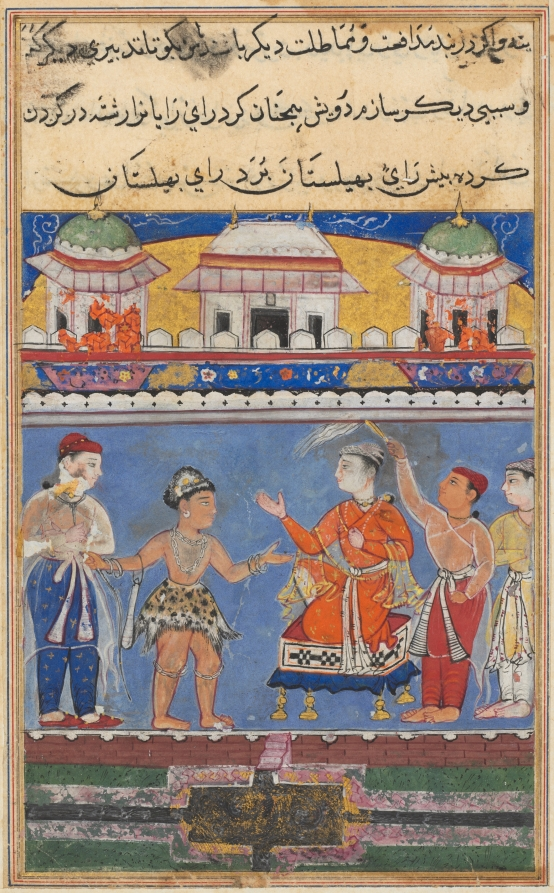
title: The dervish brings the King of Kings before the king of Bahilistan, from a Tuti-nama (Tales of a Parrot): Seventh Night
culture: Mughal India, court of Akbar (reigned 1556–1605)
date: c. 1560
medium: gum tempera, ink, and gold on paper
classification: Painting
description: The vizier advised the king that he should tell the dervish that he must bring the head of the King of Kings before he will give his daughter in marriage to him. The dervish then went to the King of Kings with his plight, who said that he would go himself to the local king, and bring him his head still attached to his body. At the bottom of the composition is a formal garden with leafy groundcover and canals of water. The composition has been altered, as there was an oval of gold beneath the central pool of water and orange tiles under the architectural pavilions on the roof. The strip of blue with delicate floral arabesque was added in accordance with a taste for more updated Persian styles.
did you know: This painting was likely done by the same artist who made folios 20r (1962.279.20.a), 30r (1962.279.30.a), and 46v (1962.279.46.b).